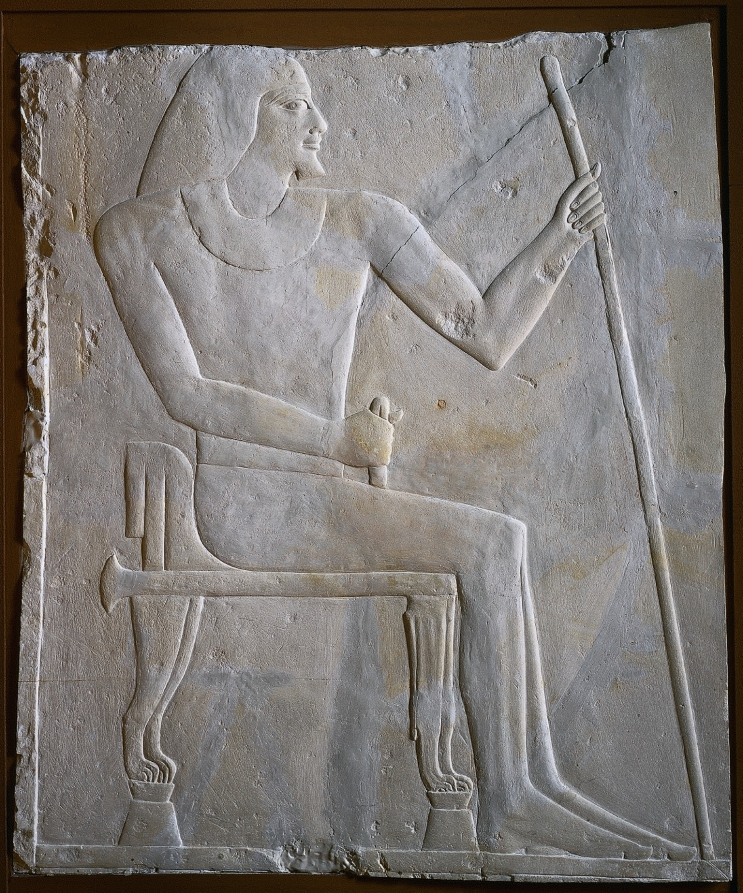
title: Relief of Nyankhnesut Seated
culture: Egypt, Saqqara, Old Kingdom (2647–2124 BCE), Dynasty 6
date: c. 2311–2281 BCE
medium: painted limestone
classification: Sculpture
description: Nyankhnesut was a high official who lived during Dynasty 6 (2311-2281 BC). Reliefs from his tomb appeared on the art market in the early 20th century and are now dispersed in 15 museums and several private collections worldwide. Although the style of the carving indicates that the reliefs came from Saqqara, the tomb’s exact location in that great necropolis was not revealed until 2000 during excavations by the Egyptian government. The scenes center on food production and the provisioning of the tomb. As the tomb owner looks on, men bring in trays bearing bread and baskets of fruit. Others bring live poultry or lead in animals, both wild (antelope) and domesticated (oxen) for sacrifice. The largest, most important relief depicts agricultural scenes. The farmer’s activities are labeled: "sowing" and "plowing" in the upper register, "pulling flax" below. In the center, a man plays the flute to entertain the harvesters. Directly below him, a man stretches out his arms, holding a sickle and an ear of grain, exclaiming, "What a beautiful day." Detailed and lively scenes such as these magically ensured an everlasting supply of food for the deceased.